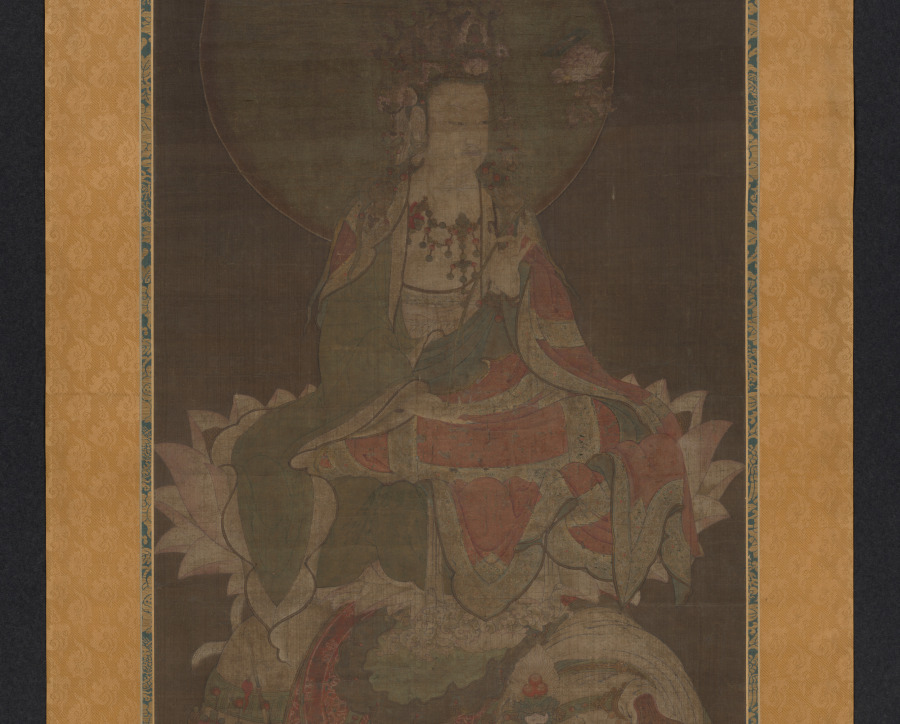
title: Samantabhadra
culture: China, Southern Song dynasty (1127-1279)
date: 1100s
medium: hanging scroll; ink and color on silk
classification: Painting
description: In the last chapter of the Lotus Sutra, one of the principal Buddhist texts, the great Bodhisattva Samantabhadra is described advancing to earth, riding on a six-tusked elephant, and proclaiming himself protector of the faithful. More frequently, he is shown with Bodhisattva Manjusri as the attendants of Shakyamuni (the historical Buddha). This scroll is probably the left panel in a triptych (group of three paintings) portraying these deities.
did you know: Samantabhadra holds a lotus with a sutra on top of the blossom.